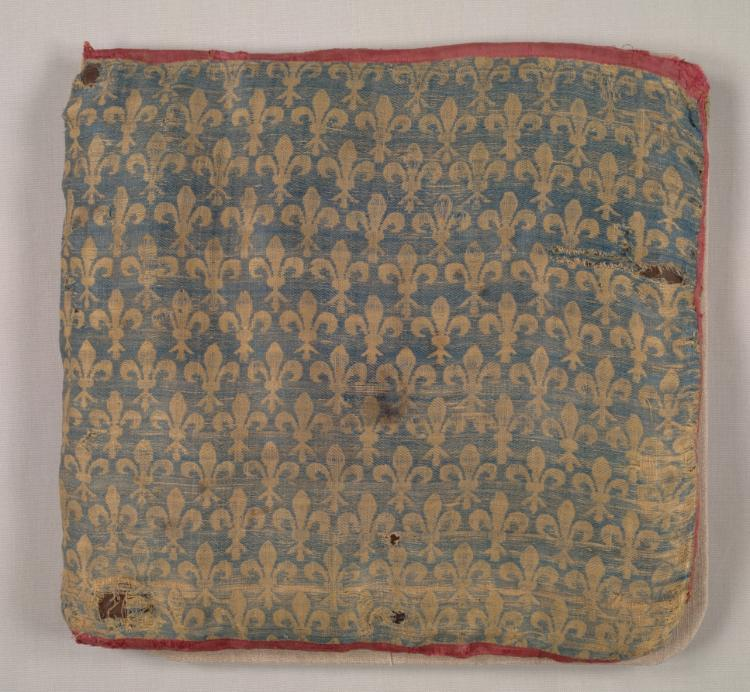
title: Reliquary Bag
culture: Spain, Mudejar, 13th century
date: 1200s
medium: compound twill weave: silk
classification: Textile